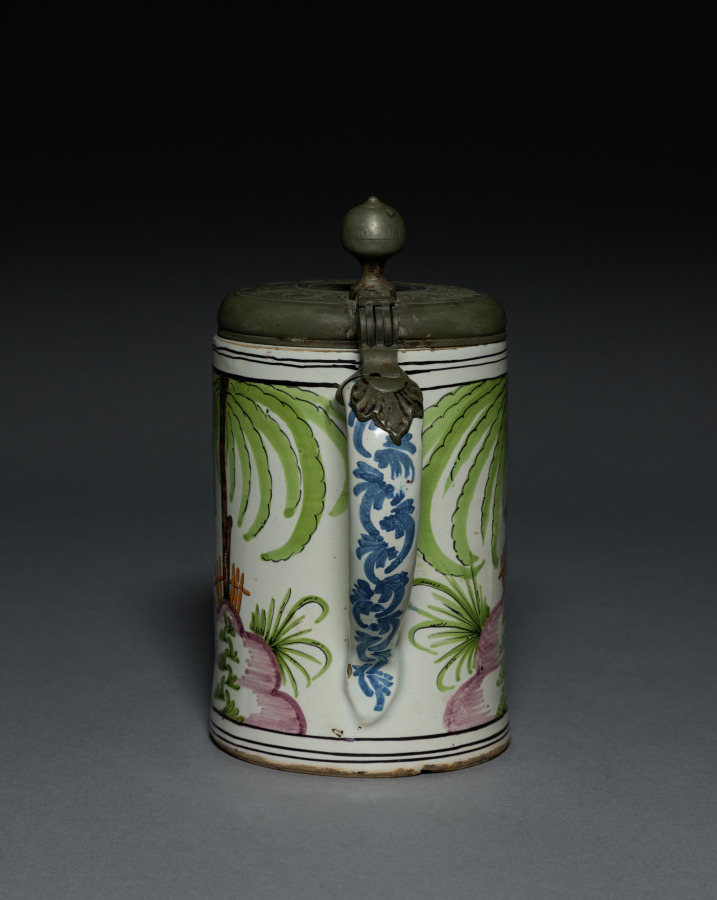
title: Tankard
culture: Germany, Aumund (Vegesack), 18th century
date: c. 1750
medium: faience with pewter cover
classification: Ceramic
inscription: inscribed on pewter cover: "Johan/Grother" (probably name of first owner).